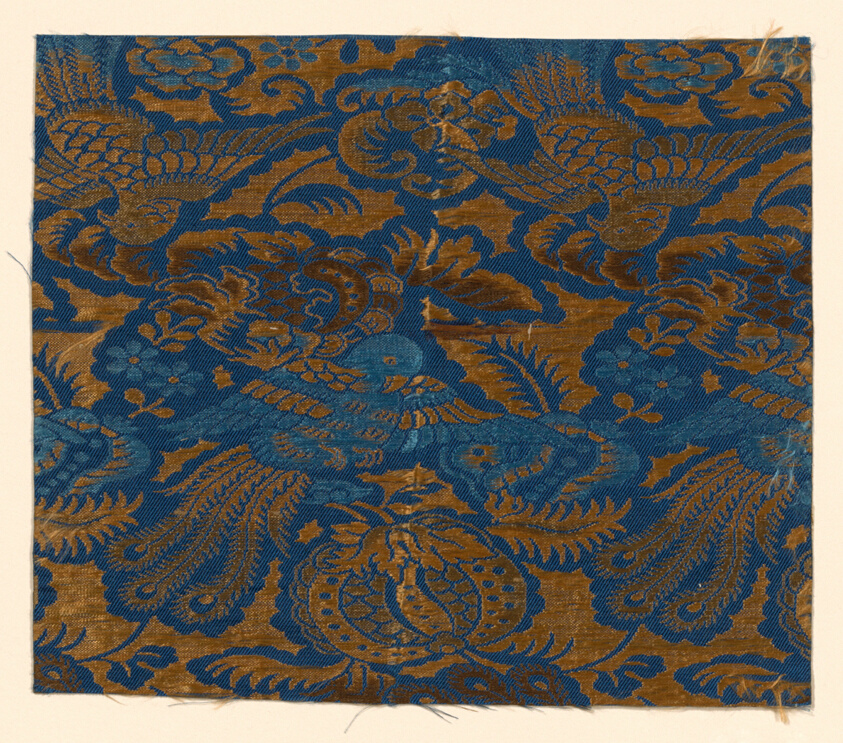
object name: Textile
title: Fragment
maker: Japan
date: late Edo period (1789–1868)/ Meiji period (1868–1912), 19th century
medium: Compound twill and silk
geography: Japan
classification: textile; weaving